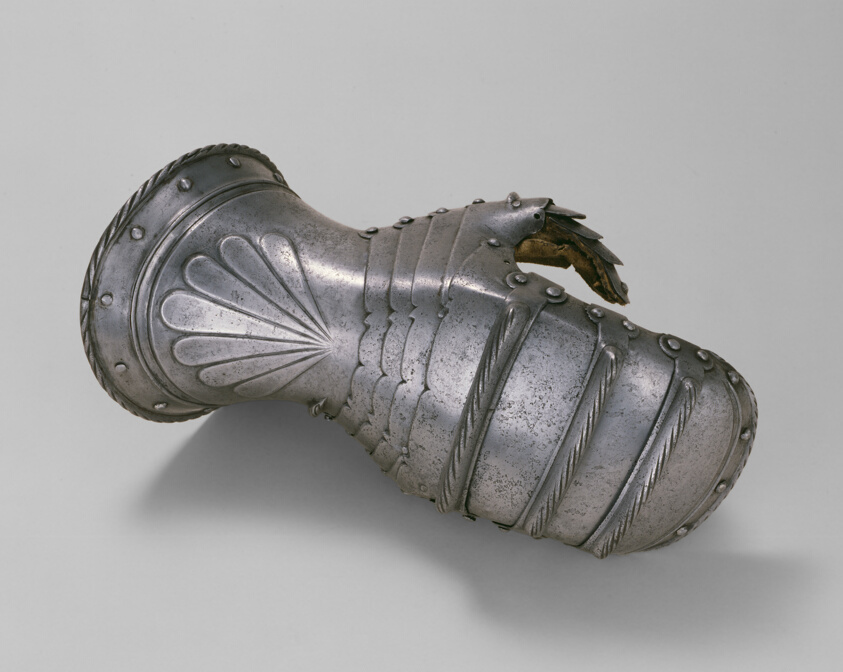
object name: Armor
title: Mitten Gauntlet for the Right Hand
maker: Probably Jörg Seusenhofer; Austrian, Innsbruck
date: c. 1530/40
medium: Steel and leather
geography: Innsbruck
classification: suit-gauntlet; armor; arms and armor